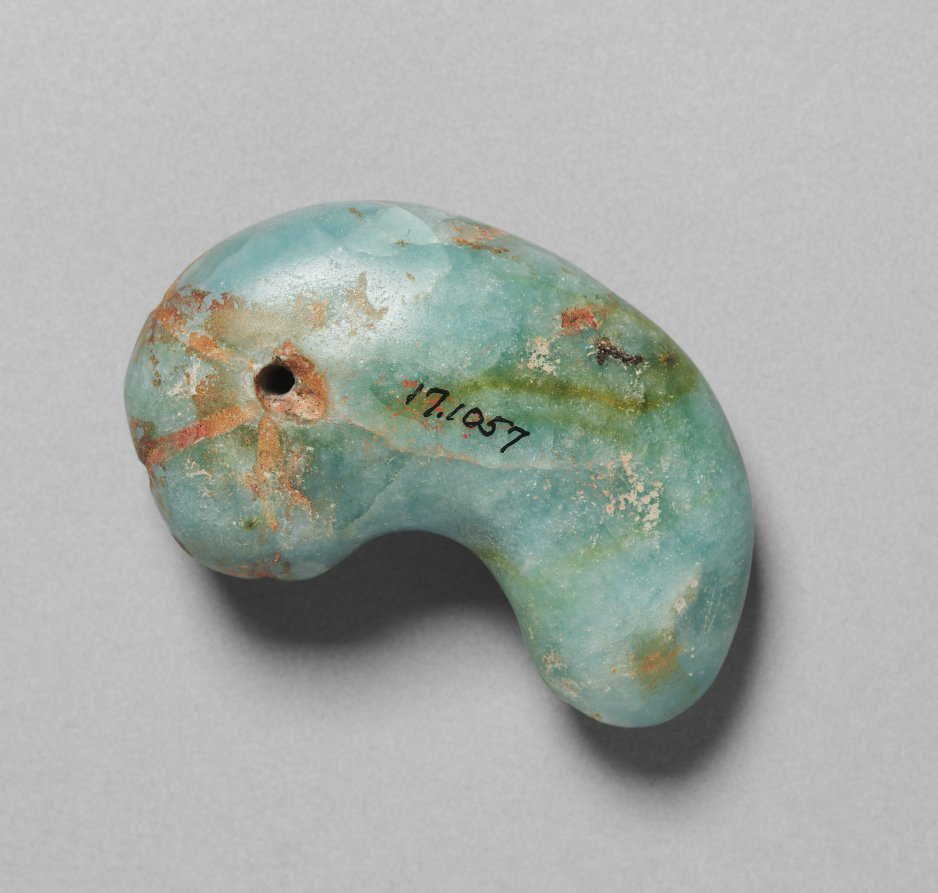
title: Comma-shaped Jade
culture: Korea, Three Kingdoms period (57 BCE–668 CE)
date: 400s CE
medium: jade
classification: Jewelry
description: Jade is one of the hardest stones and requires an intensive, arduous process of abrasion—cutting, chiseling, grinding, and polishing—to achieve the desired shape. A grindstone and a slurry of grit and water shape the jade into the desired form, and then a cloth dampened and rubbed with finer grit may have been used to give the jade the smooth surface. For the Silla kingdom (57 BC–985), in particular, comma-shaped jades served as an essential item for the burials of the ruling class and were luxurious accessories to decorate golden crowns. Their comma shape is thought to represent embryonic forms, symbolizing life, particularly rebirth in the afterlife.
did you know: This unique shaped jade was used as a pendant to decorate necklaces, eyerings, and crowns during the Three Kingdoms period.